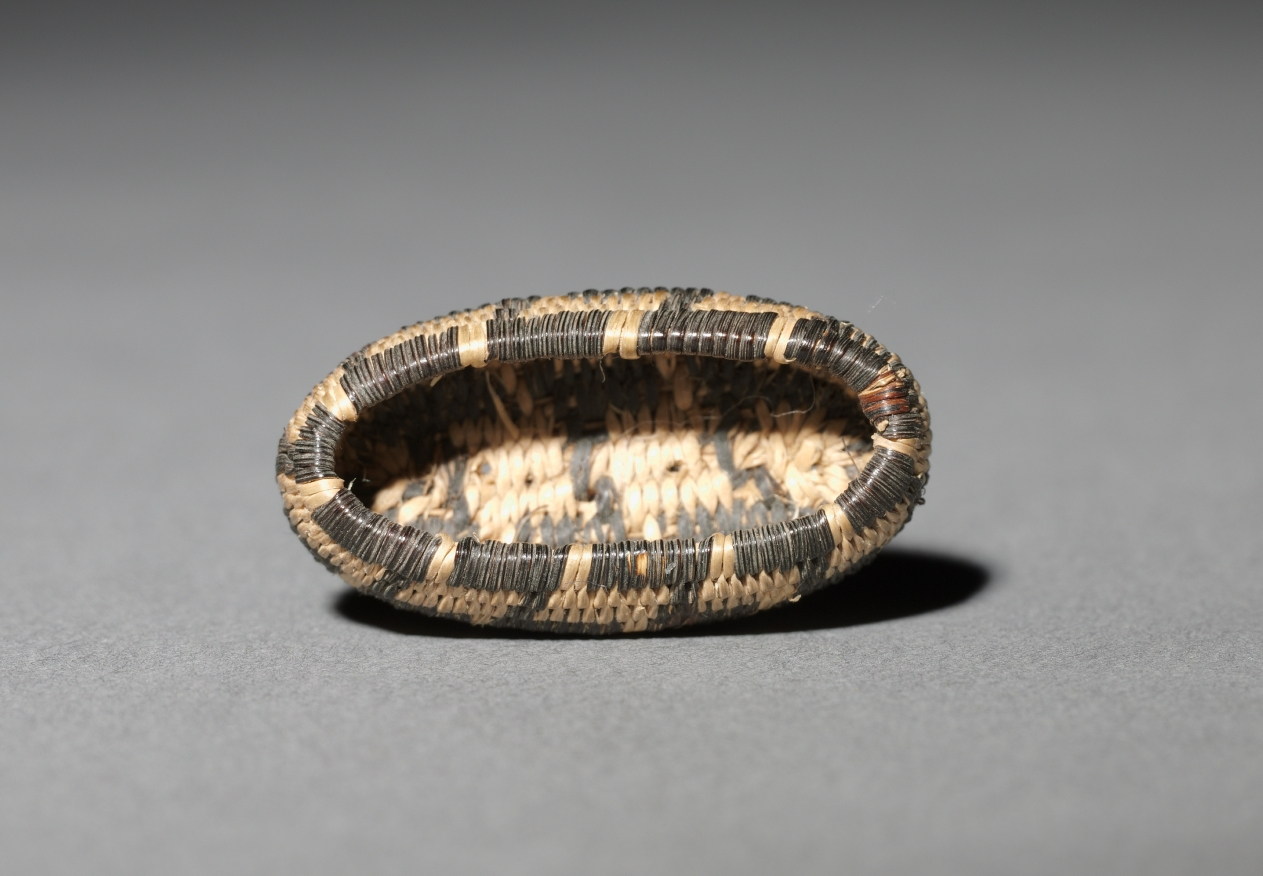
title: Miniature Rhomboidal Basket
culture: California, Pomo, late 19th-early 20th century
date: late 1800s-early 1900s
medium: plant materials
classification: Basketry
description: Miniature baskets were made to demonstrate the basket-maker’s virtuoso skill, and these tiny marvels seem to be no exception—the smallest are just a few millimeters wide but still patterned. For such fine work, dexterity was required as much for preparation of materials as for weaving.